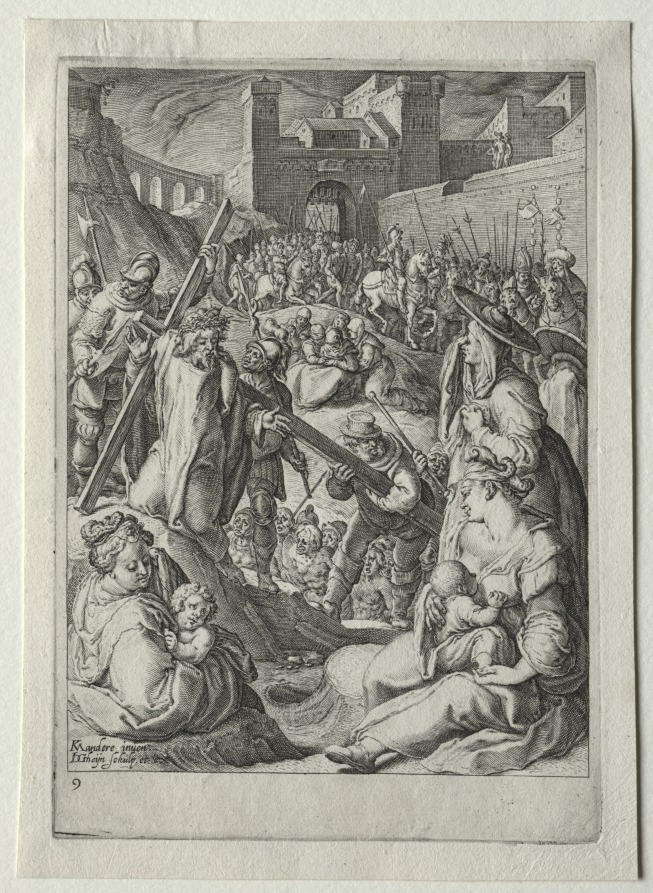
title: Passion Set: Christ Carrying the Cross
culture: Netherlands, 16th century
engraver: Jacob de Gheyn II (Netherlandish, 1565–1629)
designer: after Karel van Mander I (Dutch, 1548-1606)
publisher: Jacob de Gheyn II (Netherlandish, 1565–1629)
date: 1596–98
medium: engraving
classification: Print